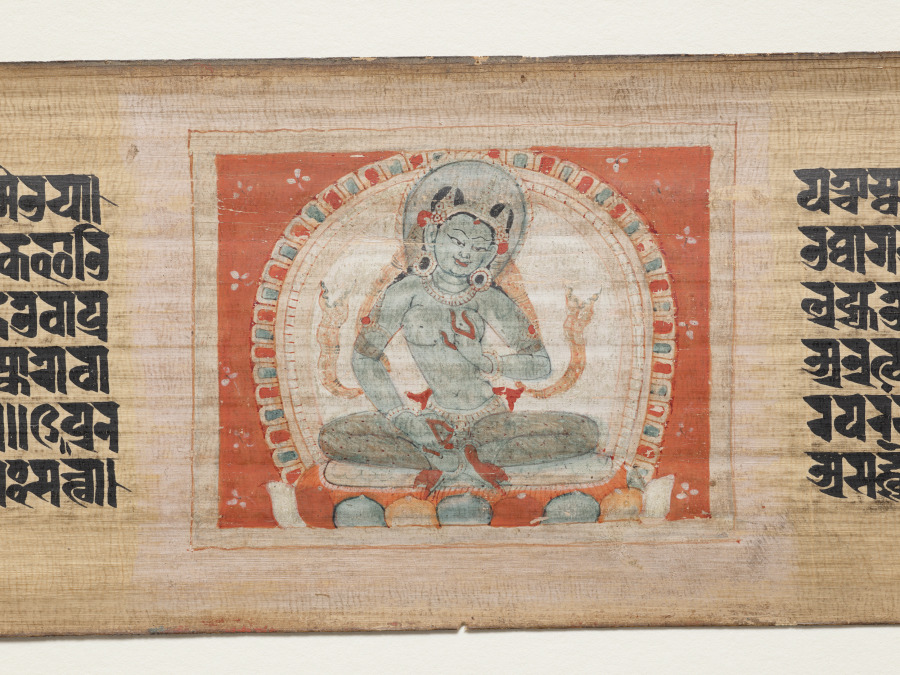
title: Three female figures, folio 89 (verso), from a Manuscript of the Perfection of Wisdom in Eight Thousand Lines (Ashtasahasrika Prajnaparamita-sutra)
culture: Eastern India, Bihar, Vikramashila Monastery. Painting: Nepal, Kathmandu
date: Sunday, September 14, 1119 (year 239 of the Newar Samvat in the month of Ashvina)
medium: gum tempera and ink on palm leaf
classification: Painting